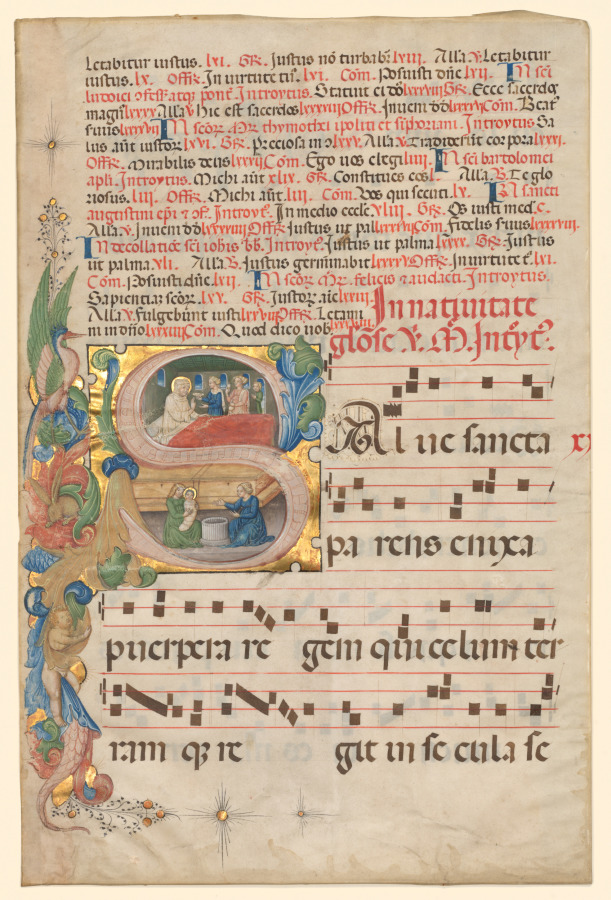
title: Leaf from a Gradual: Historiated Initial S[alve Sancta Parens] with Birth of the Virgin (recto) and Music (verso)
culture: Northern Italy, 15th century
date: c. 1420–50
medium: ink, tempera, and gold on vellum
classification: Manuscript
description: This beautiful leaf is dominated by a large historiated S from which sprays of foliage inhabited by a putto, a rabbit, and a stork extend into the left margin. A scene representing the birth of the Virgin is within the double curve of the S. Saint Anne, the Virgin’s mother, occupies the birthing bed in the upper scene. Below, the infant Mary has been bathed and wrapped in swaddling clothes. In manuscript missals and their musical counterparts, the gradual, votive masses are generally assigned one to each day of the week with Saturday reserved for the Blessed Virgin. The votive Mass to the Virgin varied from season to season. Three masses were, therefore, supplied—one for advent, one to be used from Christmas to purification, and a third, represented by this leaf, to be used from purification to advent. This text reads: Salve sancta parens (“Hail Holy Parent”) introducing the opening of the introit for the Saturday votive Mass for the Nativity of the Virgin (September 8) in the liturgical calendar. The identity of the artist remains elusive, as does his precise place of origin. The figure style and ornament suggest a source in North Italy, perhaps in an artistic center such as Pavia, Mantua, or Padua.